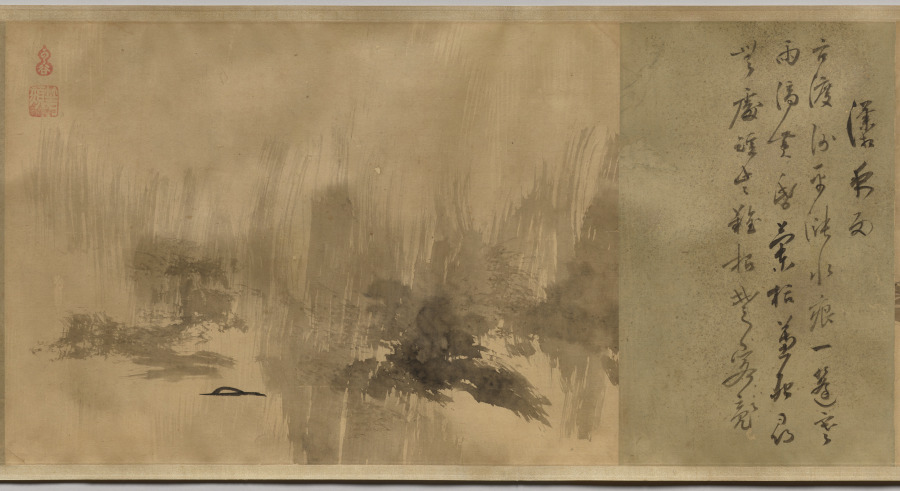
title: Poems and Pictures of the Eight Views of Xiao-Xiang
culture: Japan, Momoyama period (1573–1615)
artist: Unkoku Tōgan (Japanese, 1547–1618)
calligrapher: Inkei Gentetsu (Japanese, 1562–1612)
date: 1605–12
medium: Handscroll; ink on paper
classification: Painting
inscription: Each painting sealed with red gourd-shaped seal reading Unkoku (雲谷) and a square seal reading Tōgan (等顔).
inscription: Each painting prefaced with a titled poem on the Eight Views of Xiao-Xiang by Yujian Ruofen (active late 13th century) inscribed by Japanese Buddhist monk Inkei Gentetsu (1562–1612).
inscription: 右寫玉㵎之筆勢／雪舟末葉等顔筆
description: Unkoku Tōgan brushed these scenes using the splashed-ink technique associated in Japan with the Chinese monk Yujian Ruofen (active late 1200s). Xiao-Xiang refers to the region in present-day Hunan province, where the Xiang River and its tributaries converge. Each of the eight views evokes a time of day or season. The earliest surviving series of Xiao-Xiang paintings is by Wang Hong (active mid-1100s), but textual evidence tells us the theme appears earlier. It was later adopted in Japan and Korea, as seen here. The poems were inscribed by Inkei Gentetsu, the third abbot of the Rinzai Zen temple Tōshunji, Japan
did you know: The “Tō” of Tōgan comes from the name of painter Sesshū Tōyō (1420–1506).